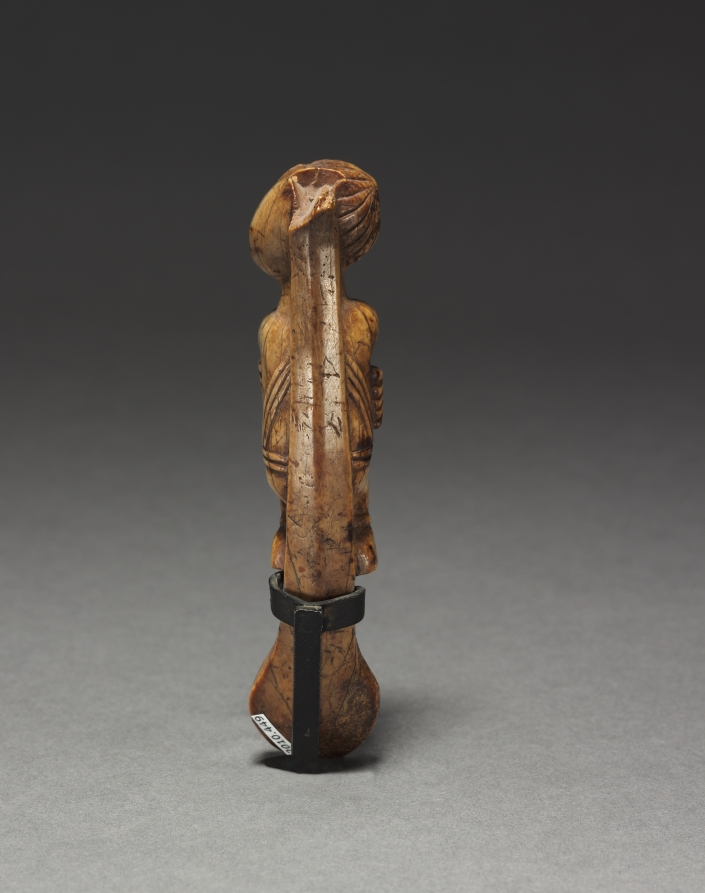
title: Female Figurine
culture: Africa, Central Africa, Democratic Republic of Congo (most likely), Cabinda, or Republic of the Congo, probably Yombe-style maker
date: late 1800s–early 1900s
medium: Ivory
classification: Sculpture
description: This female figurine may be a fragment of a spoon or spatula, but is not confirmed. Iconography of the human image is common in the art of Kongo-speaking peoples, however, this object’s function or purpose is unknown. The position of the arms has been interpreted as that of a bound prisoner while the positioning of the head represents a broken neck or severed head, thus identifying as a sacrificial victim.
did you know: This object is believed to be a portion of a spoon or a spatula. The position of the prisoner is believed to be a sacrificial victim.